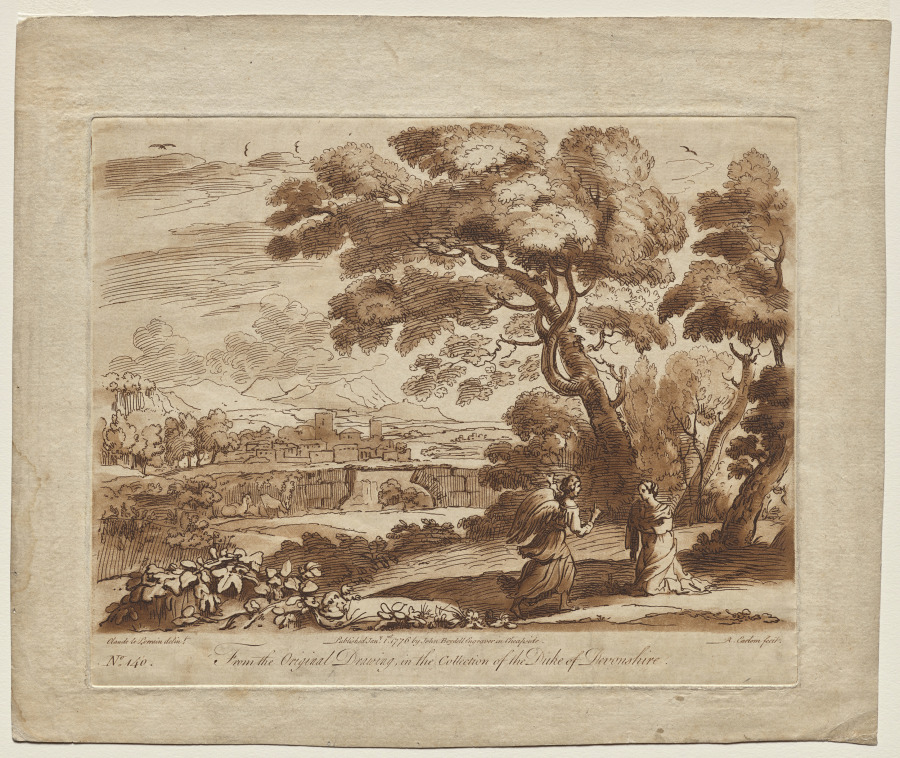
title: Landscape, Plate No. 140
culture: England, 18th century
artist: Richard Earlom (British, 1743–1822)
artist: after Claude Lorrain (French, 1604–1682)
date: 1776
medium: etching and roulette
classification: Print